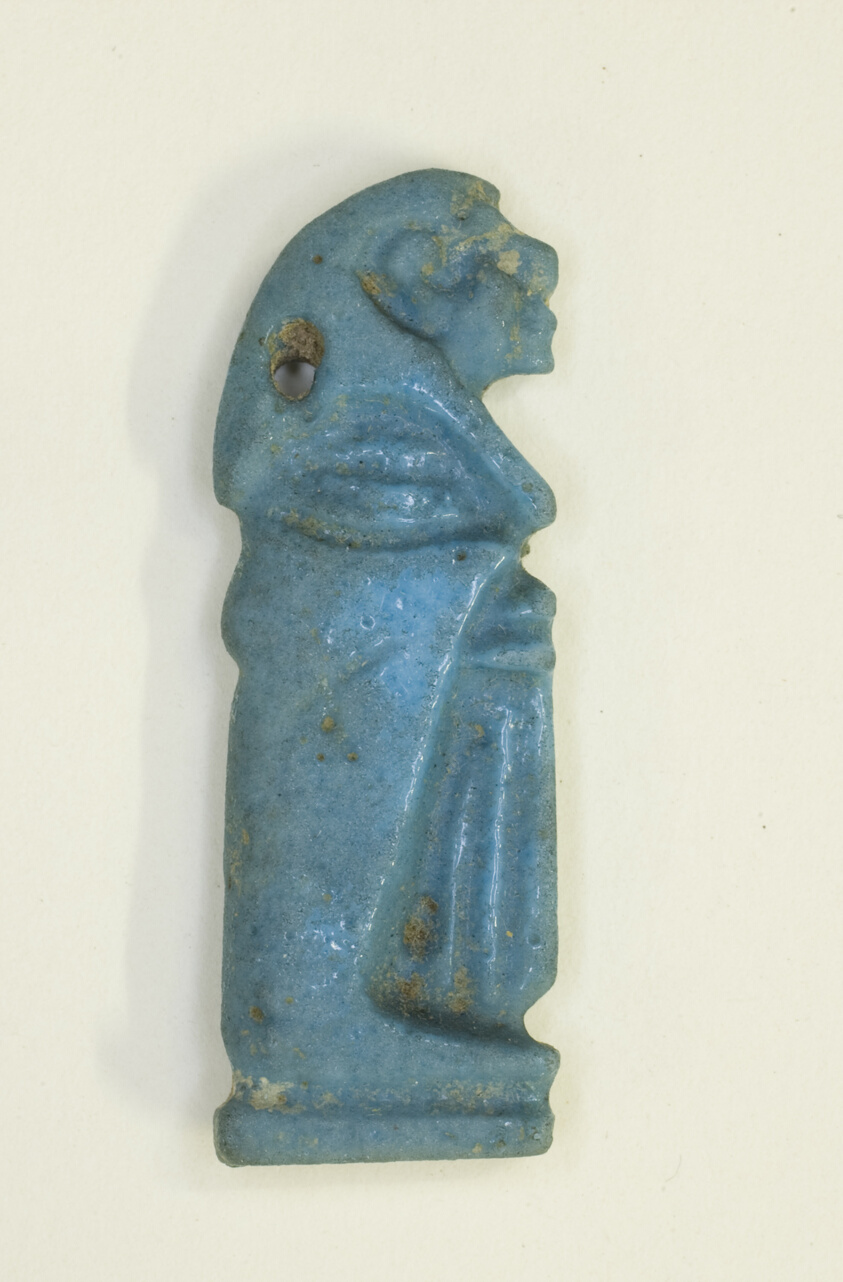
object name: Costume and Accessories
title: Amulet of the God Imsety (one of the four Sons of Horus)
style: third intermediate period, egyptian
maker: Egyptian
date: Third Intermediate Period, Dynasty 21–25 (1070–656 BCE)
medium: Faience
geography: Egypt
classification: amulet; jewelry; ceramics; ancient art; costume; faïence (composite material)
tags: gods (deities), mummies